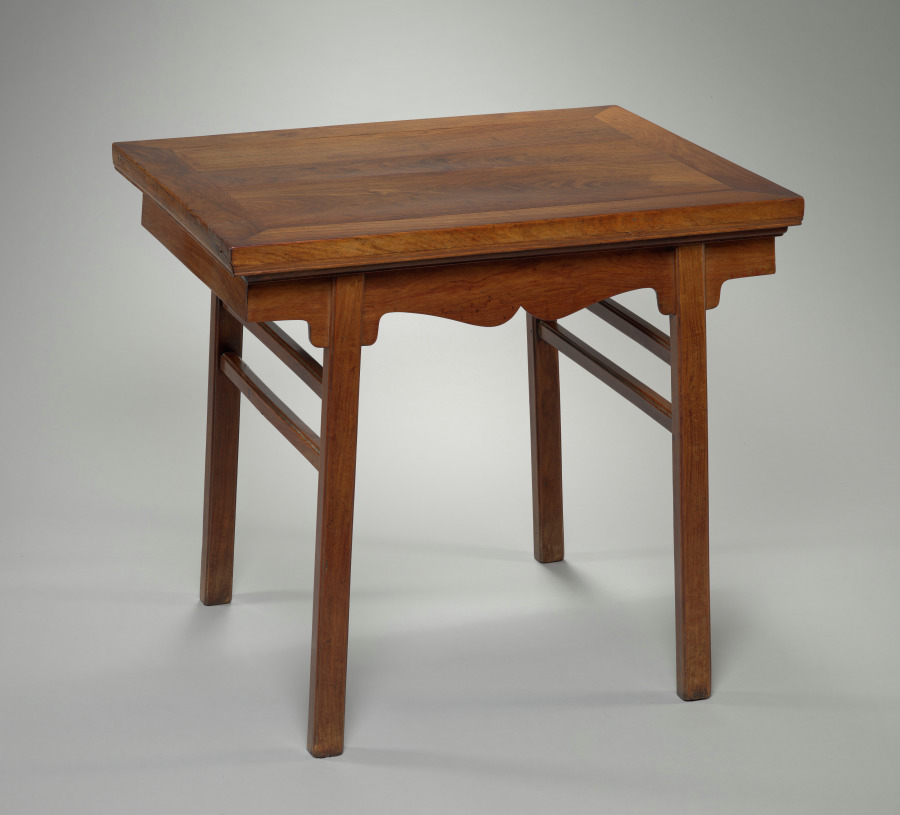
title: Game Table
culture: China, Ming dynasty (1368-1644) - Qing dynasty (1644-1911)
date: 1600s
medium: Rosewood (huanghuali)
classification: Furniture and woodwork